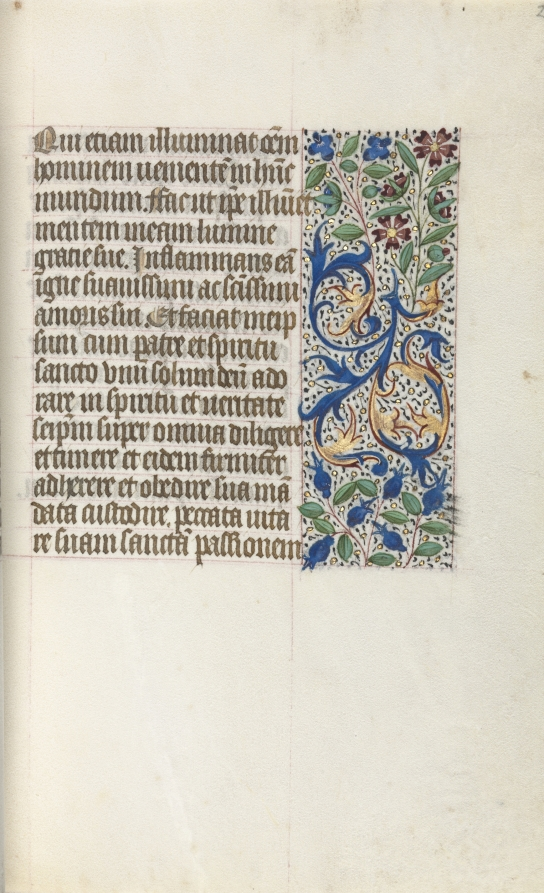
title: Book of Hours (Use of Rouen): fol. 26r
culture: France, Rouen, 15th century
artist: Master of the Geneva Latini (French, active Rouen, 1460–80)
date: c. 1470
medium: ink, tempera, and gold on vellum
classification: Bound Volume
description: In the late 1400s and early 1500s Rouen was an established and important center of book production. The city’s cathedral had a wealthy chapter that spent large sums of money to commission books and to maintain its extensive library. The stationers and booksellers would have likely been concentrated in or near the cathedral precinct. This artist, named after a manuscript now in Geneva, was Rouen’s principal illuminator during the second half of the 1400s.